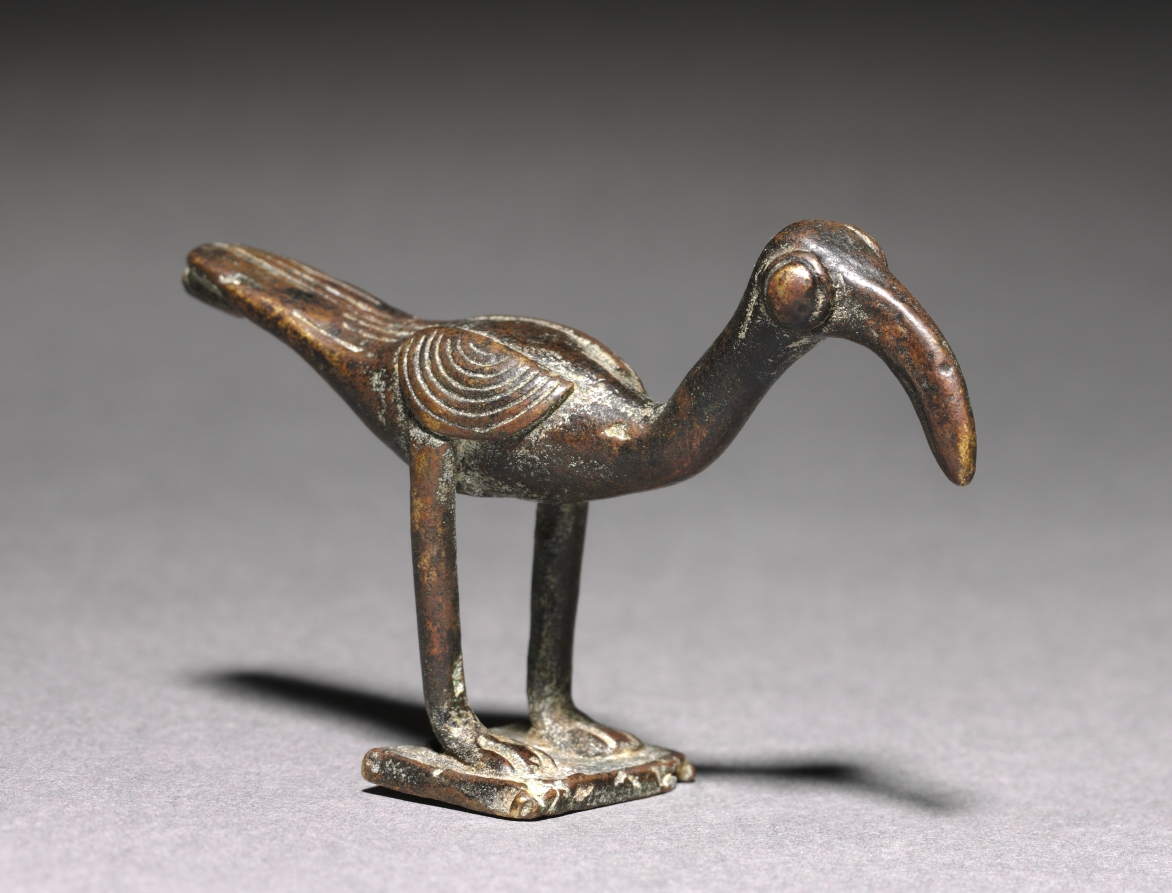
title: Hornbill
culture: Africa, West Africa, Côte d'Ivoire, Senufo style, unknown maker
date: 1900s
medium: Copper alloy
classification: Sculpture